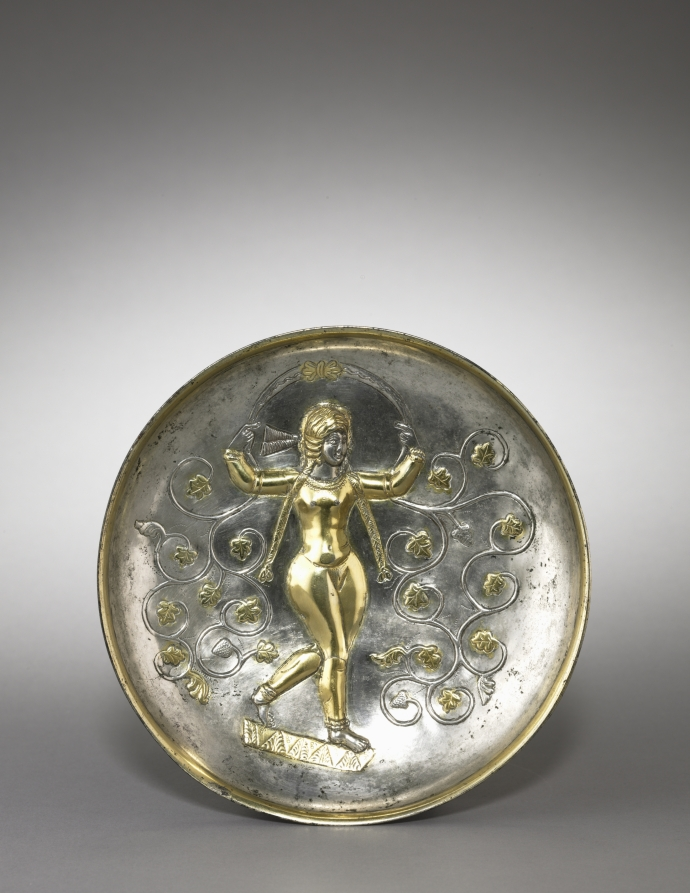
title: Dish: The Goddess Anahita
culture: Iran, Sasanian Empire (224–651 CE)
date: 400–600 CE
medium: silver gilt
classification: Metalwork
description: Anahita, the Zoroastrian goddess of water and fertility, was one of the last of the ancient tradition of Near Eastern nude mother goddesses.